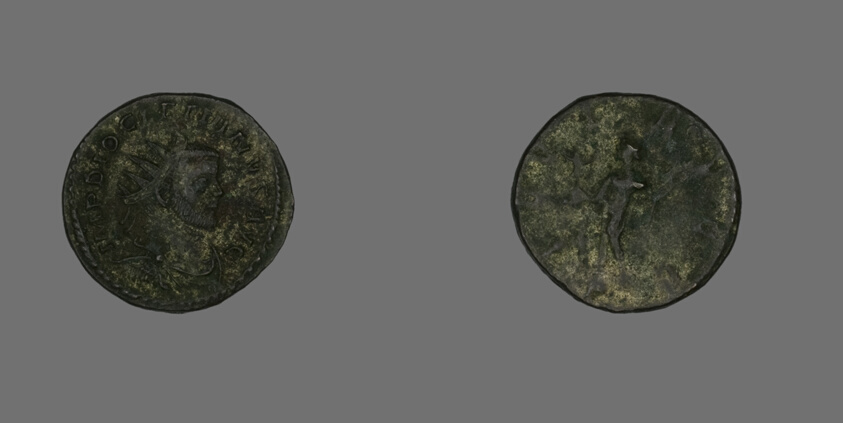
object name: Coin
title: Antoninianus (Coin) Portraying Emperor Diocletian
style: roman (ancient, style or period), ancient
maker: Roman, minted in Lugdunum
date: 290-291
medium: Bronze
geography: Roman Empire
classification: coin; ancient art